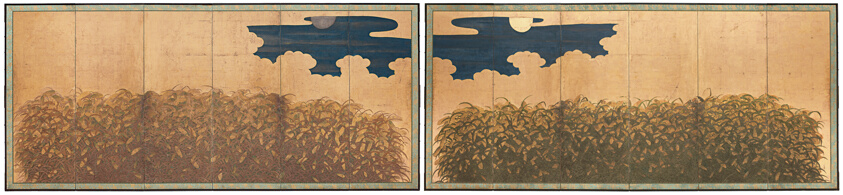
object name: Painting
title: Millet Fields under Sun and Moon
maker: Artist unknown; Japanese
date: 17th century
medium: Pair of six-panel screens; ink, colors, and gold on paper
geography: Japan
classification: screen; painting; asian art